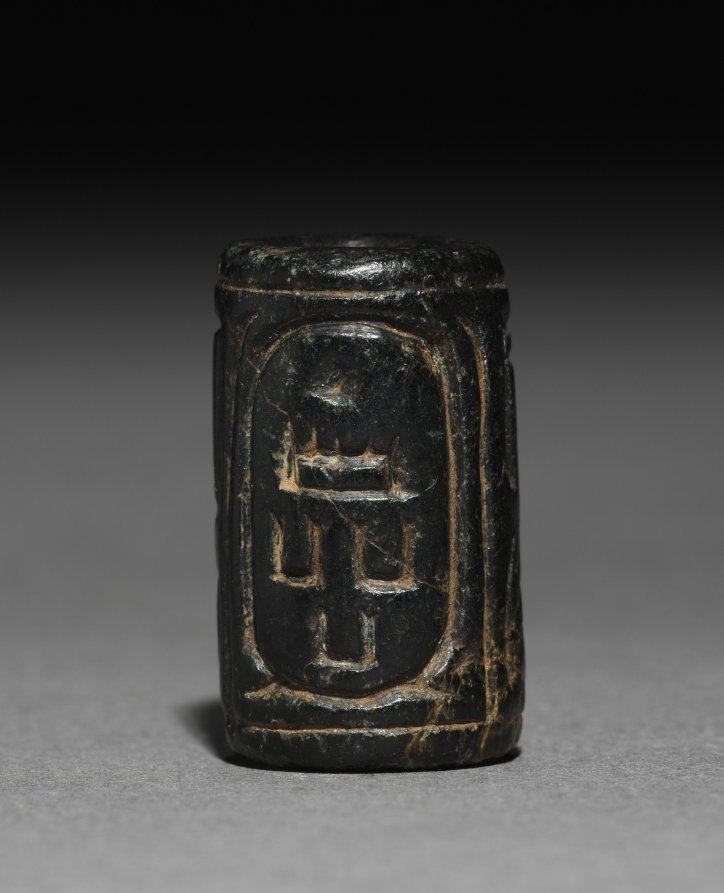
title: Cylinder Seal of Mycerinus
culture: Egypt, Old Kingdom (2647–2124 BCE), Dynasty 4, reign of Menkaure (2532–2503 BCE)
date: 2573–2124 BCE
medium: serpentinite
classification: Scarabs